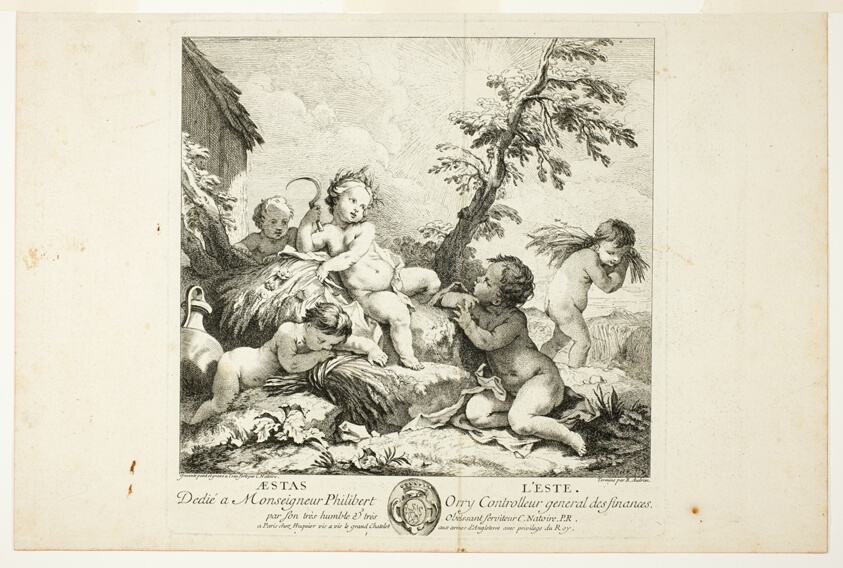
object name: Print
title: Summer, plate two from Le Quatre Saisons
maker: Charles-Joseph Natoire (French, 1700-1777)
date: 1735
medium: Etching on buff laid paper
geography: France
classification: etching; print; prints and drawing